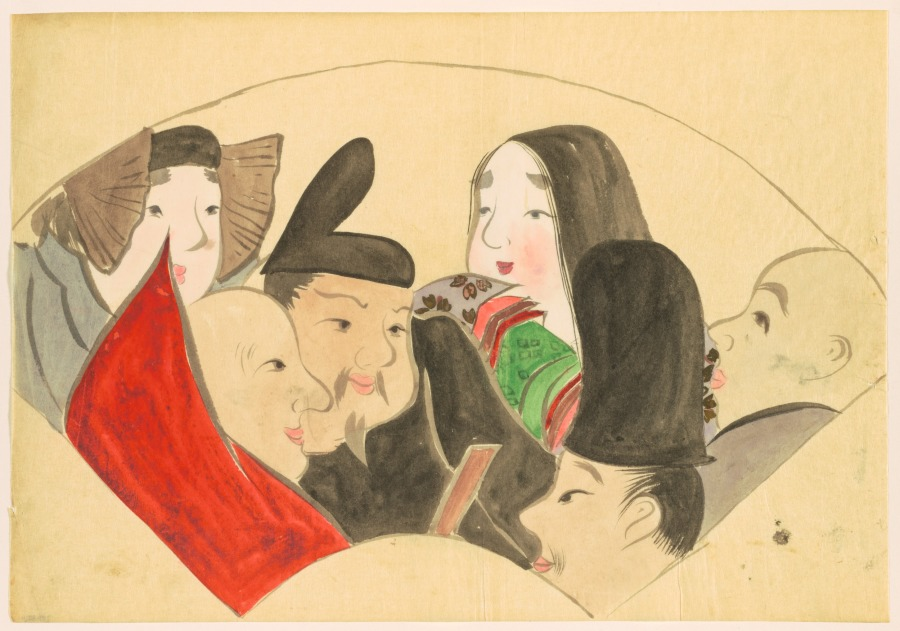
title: Flowers of a Hundred Worlds (Momoyogusa): Six Poetic Immortals (Rokkasen)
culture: Japan, Meiji period (1868–1912)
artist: Kamisaka Sekka (Japanese, 1866–1942)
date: 1909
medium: ink and color on paper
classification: Drawing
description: Kamisaka Sekka made preparatory drawings for his Flowers of a Hundred Worlds series on tracing paper with ink and color. The freehand sketches are much looser than the finished, printed compositions.